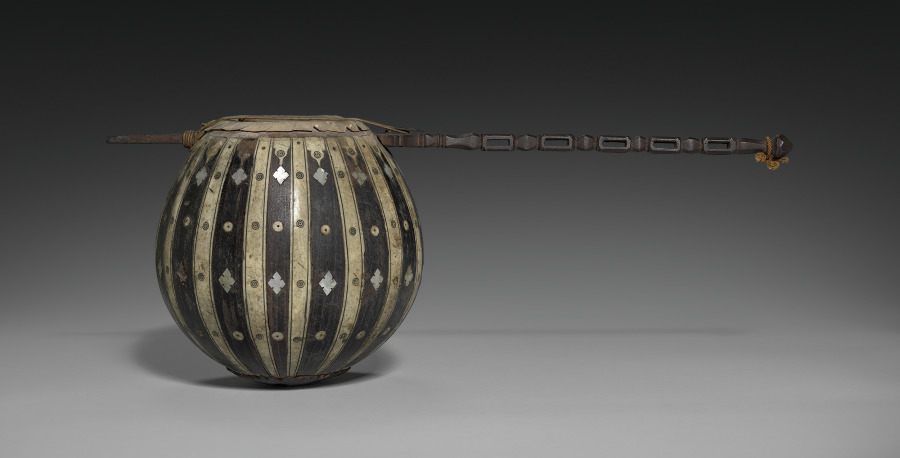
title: Kamānche (incomplete)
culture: Northern Iran (Caucasian, maybe Azerbaijan, or Kashmir)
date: 1875–1900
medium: Wood, hide, and bone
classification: Musical Instrument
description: Kamānche is a Persian term first used in the 10th century to describe an instrument that is sounded with a bow. From there, bowed instruments spread to Byzantium, Central Asia, the Far East, and then to Europe. In Egypt, it is known as the rabāb, a term known throughout the Islamic world from North Africa to Southeast Asia. The names of musical instruments often reveal origin, context, or musical function. In Europe, North Africa, and Asia where contact with Middle Eastern culture occurred, variations of Arabic and Persian terms for instruments are widespread. Usually, related names refer to similar instruments; however, this is not always true. Among these "floating terms" are the names zūrna, rabāb, kāmanja, nāy, and dombak.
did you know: The instrument's spike would be placed on the ground or today, on the knee, when it was played.